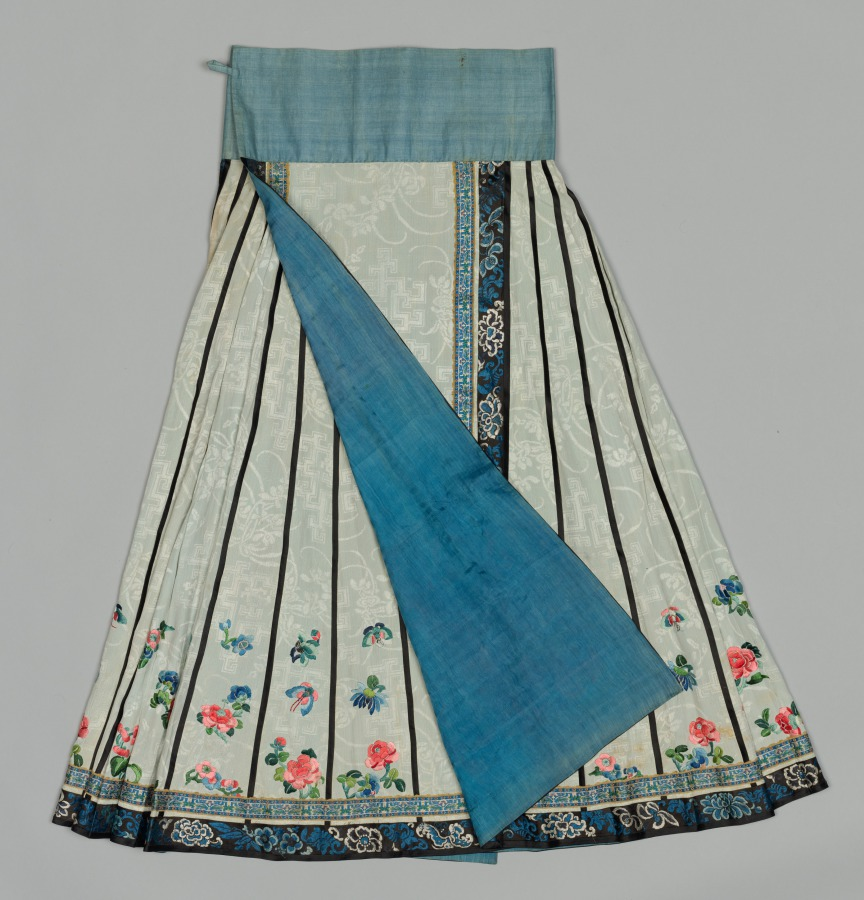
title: Skirt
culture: China, 19th century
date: 1800s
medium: embroidery, silk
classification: Garment